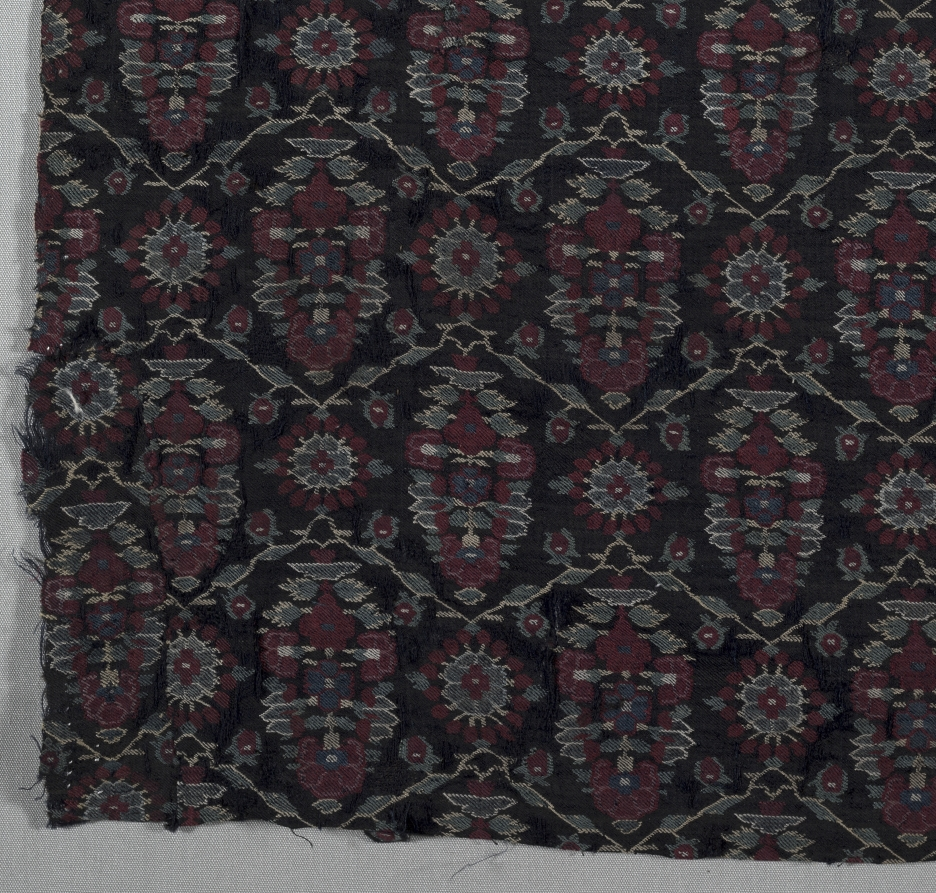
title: Fragment of a Shawl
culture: India, Kashmir, late 18th or early 19th century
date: late 1700s or early 1800s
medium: tapestry twill; wool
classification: Textile